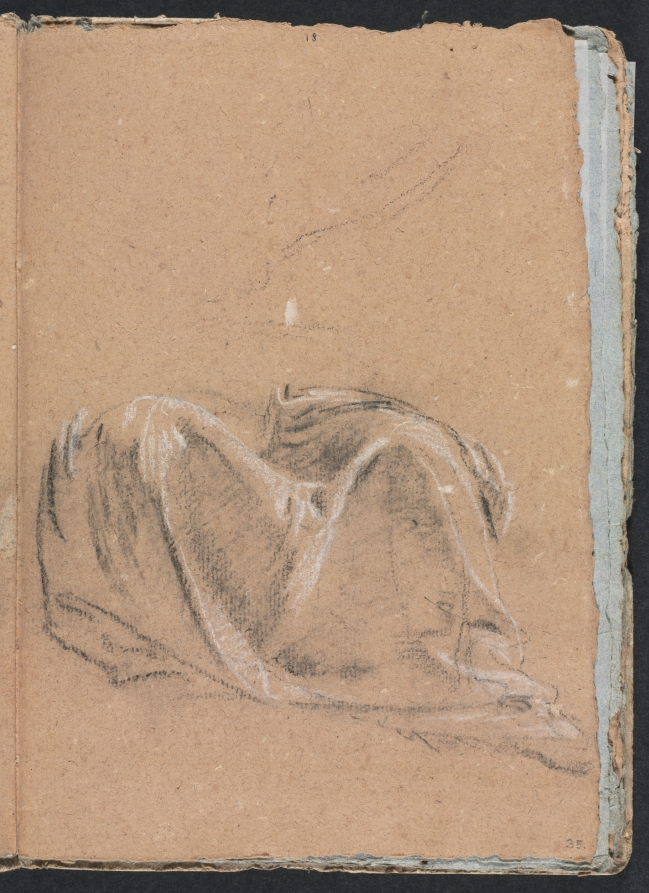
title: Verona Sketchbook: Drapery study (page 35)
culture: Italy, 18th century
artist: Francesco Lorenzi (Italian, 1723–1787)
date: 1760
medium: black chalk with white heightening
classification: Bound Volume